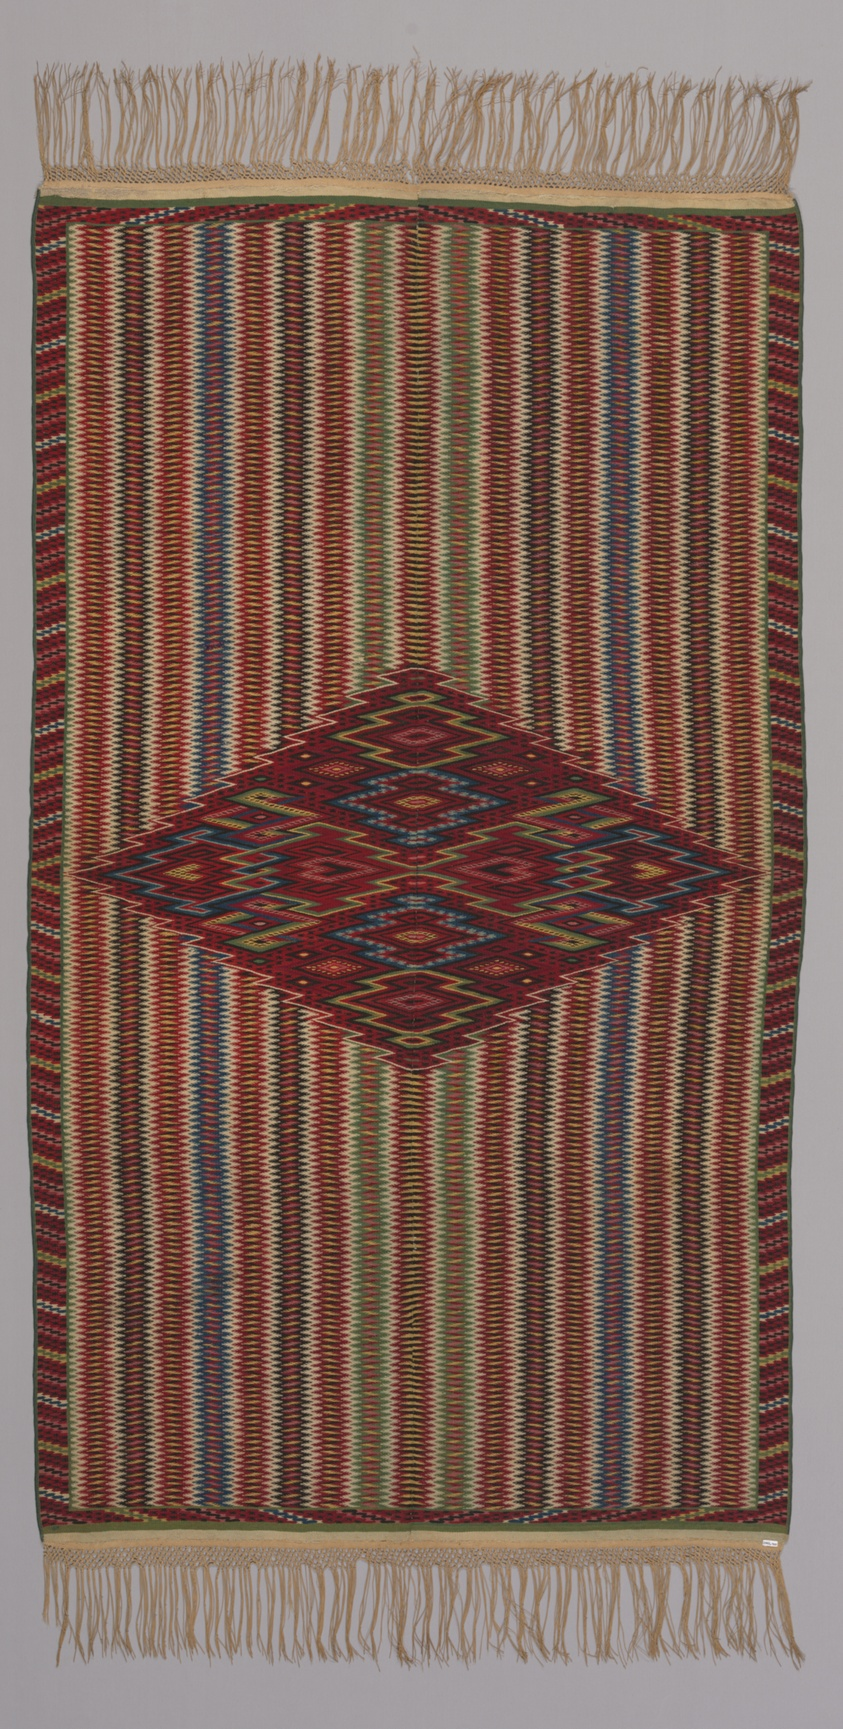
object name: Textile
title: Man's Sarape (Wearing Blanket)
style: Folk Art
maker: Saltillo, Coahuila, Mexico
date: 1800–50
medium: Cotton and wool, slit and single dovetail tapestry weave; edged with cotton, knotted fringe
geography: Saltillo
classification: textile; weaving; garment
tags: stripes, diamond shapes, diagonals, zigzags